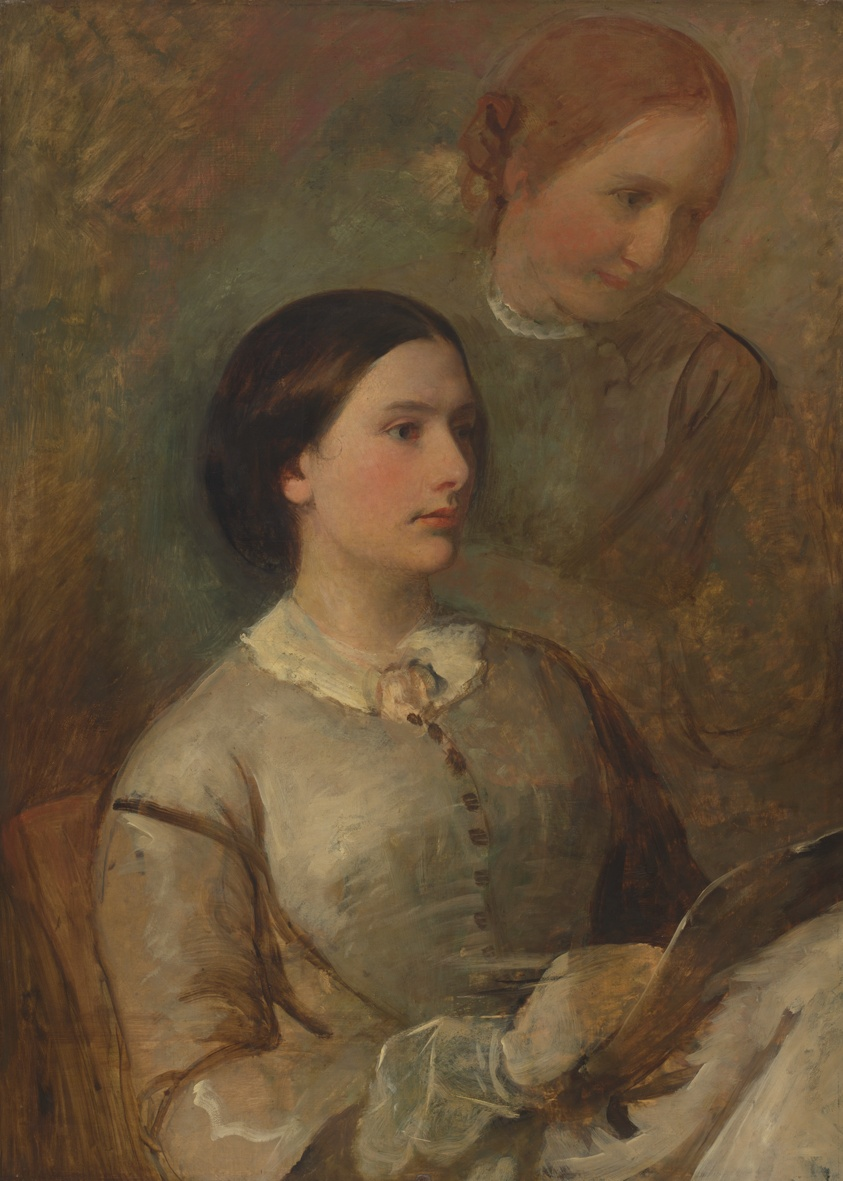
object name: Painting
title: Double Portrait: Two Women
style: 19th century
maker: Artist unknown (British, active 19th century)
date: 1845/48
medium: Oil on canvas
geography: United Kingdom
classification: oil on canvas; oil paintings (visual works); paint; painting; european painting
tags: portraits: female subject, sketch, dresser, woman, women, portrait